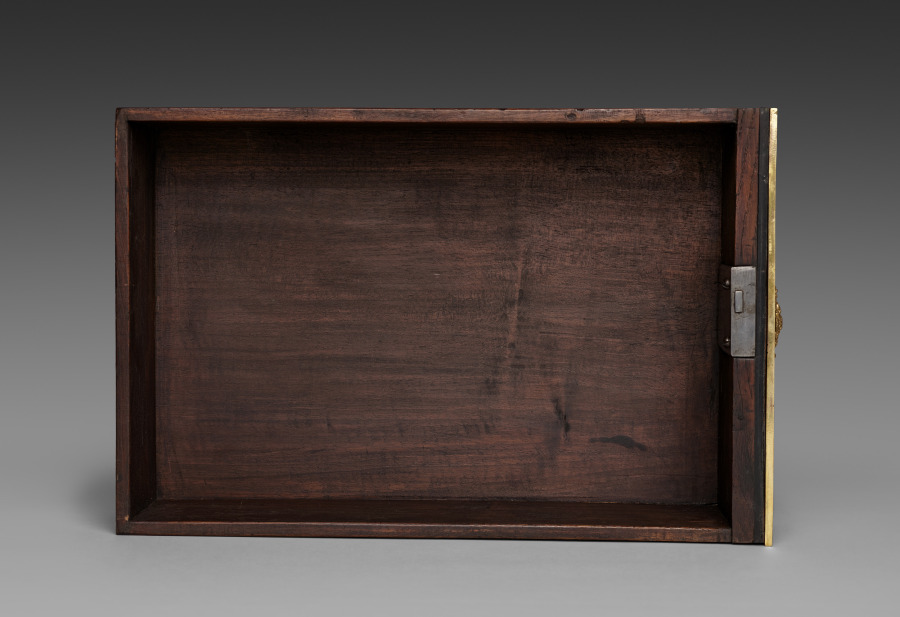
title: Side Drawer for Cabinet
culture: France, late 17th Century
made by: André-Charles Boulle (French, 1642–1732)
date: c. 1690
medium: ebony, marquetry in metal and tortoise shell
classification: Furniture and woodwork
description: Appointed cabinetmaker to King Louis XIV in 1672, André-Charles Boulle became a master of furniture making in France during the late 1600s until his death in 1732. Known primarily for his use of marquetry, in which metal patterns are inlaid into tortoiseshell then applied within the veneered surface of the furniture, Boulle established a level of quality and craftsmanship few others could achieve. As a result, his work found favor at the royal court and among other aristocrats and diplomats eager to impress the king. The inclusion of a medallion depicting Louis XIV within the bronze decoration of this chest would have identified the owner with the royal court. Often exhibiting stout architectural proportions with elegant groups of inlaid motifs such as the parrot on the central panel of this chest, Boulle’s designs are an example of the intellectual fashion for contrasting ideas, materials, and motifs.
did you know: Originally designed to sit atop an elaborate tall stand, this chest was likely altered in the late 1700s to reduce its scale and height.